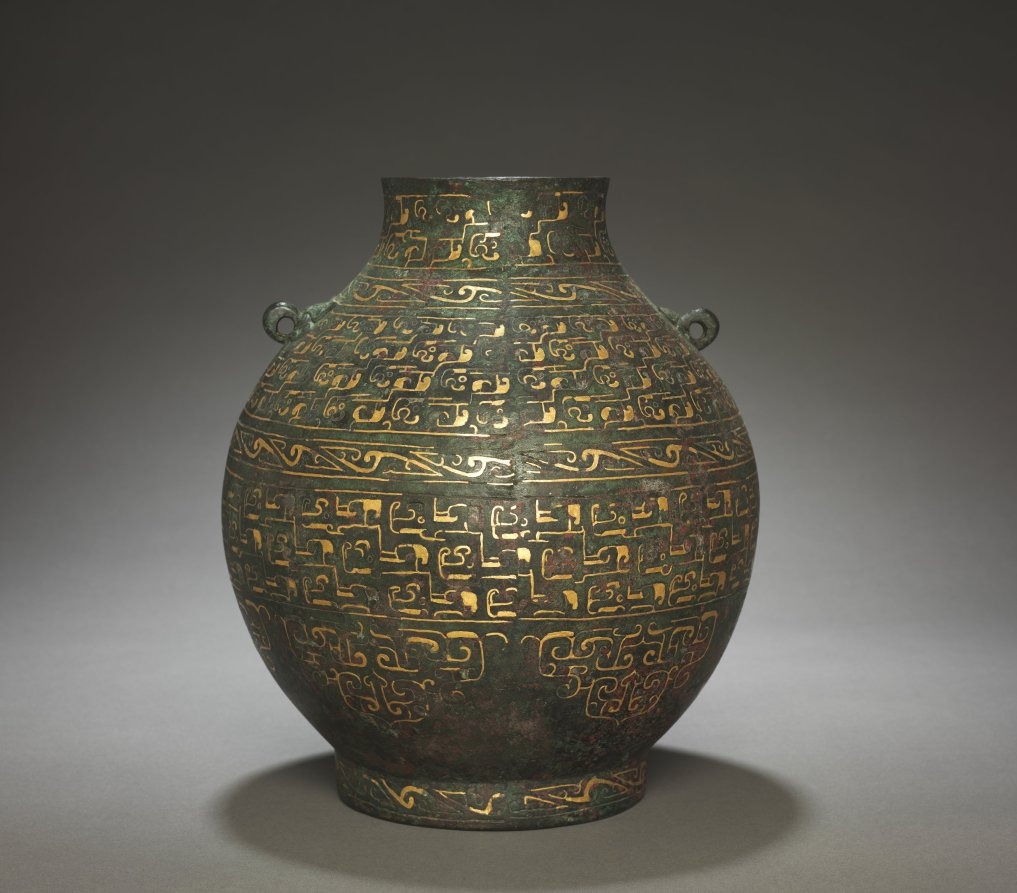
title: Wine Vessel (Hu)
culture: China, Warring States period (475–221 BCE)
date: early 400s BCE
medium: bronze with gold inlay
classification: Metalwork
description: By the time this wine vessel was cast, bronzes were increasingly losing their ritual significance and becoming symbols of prestige and conspicuous consumption. This globular jar (hu) reflects the splendor and luxury of the time. The jar is decorated with free-flowing scrollwork and interlaced zoomorphic motifs. Cast depressions were first made on the bronze surface and then inlaid with gold. A graceful fluidity is achieved by the many sweeping lines, curves, and tendril-like networks covering the round body.